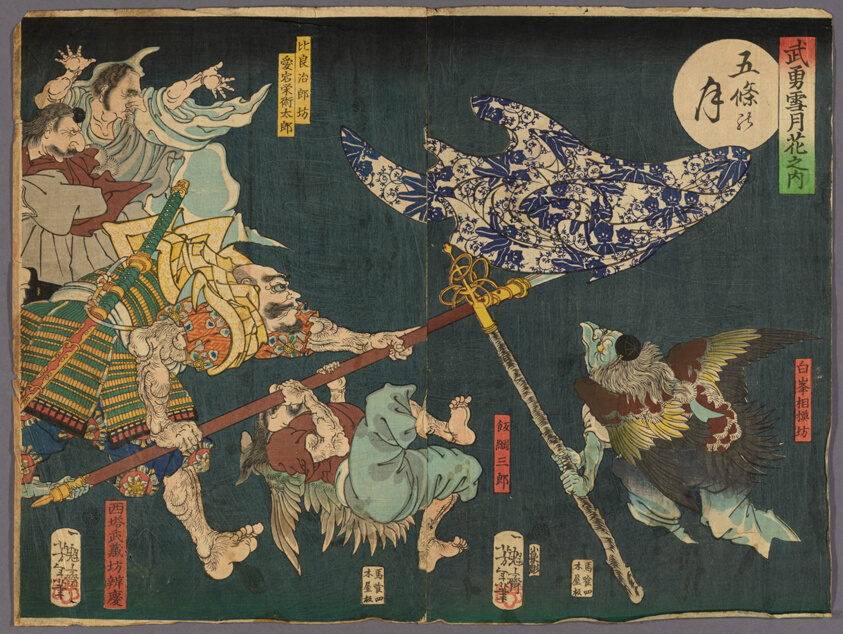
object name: Print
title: The Moon over Gojo Bridge (Gojo no tsuki), from the series "Heroes for the Snow, Moon, and Flowers (Buyu setsugekka)"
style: Japanese (culture or style)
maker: Tsukioka Yoshitoshi (Japanese, 1839-1892)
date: 1867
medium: Color woodblock print; oban diptych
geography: Japan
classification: woodblock print; print